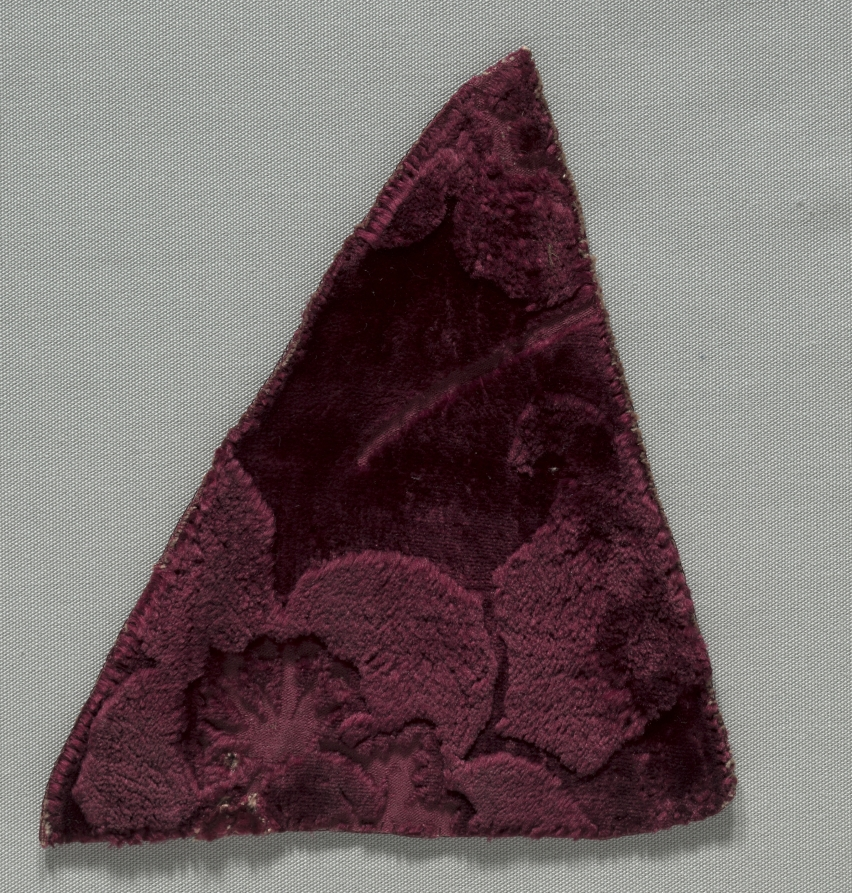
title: Two Velvet Fragments Sewn Together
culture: Italy, 15th century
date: 1400s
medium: velvet (cut and voided)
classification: Velvet